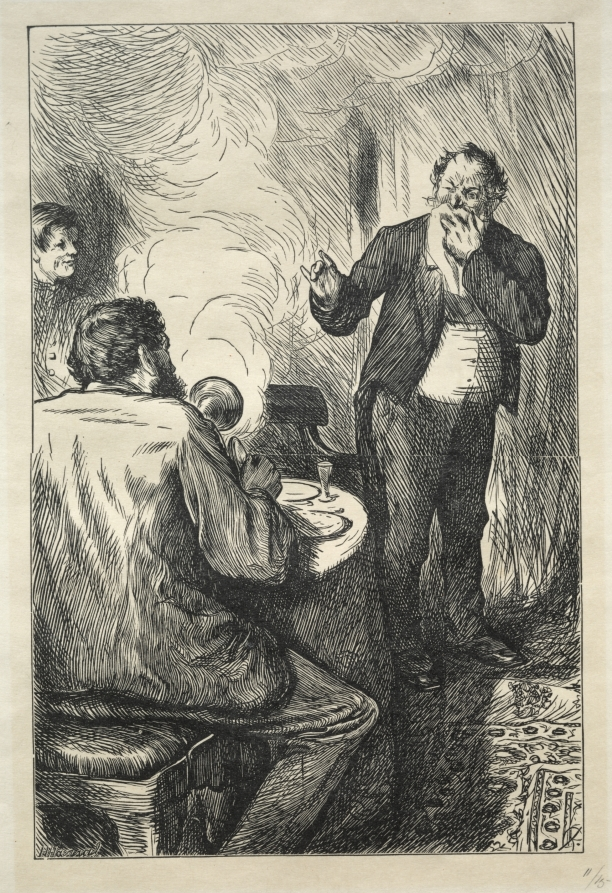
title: Smoking Strictly Prohibited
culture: England, 19th century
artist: Horace Harral (British, 1817–1905)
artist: after Charles Samuel Keene (British, 1823–1891)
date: c. 1867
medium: wood engraving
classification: Print